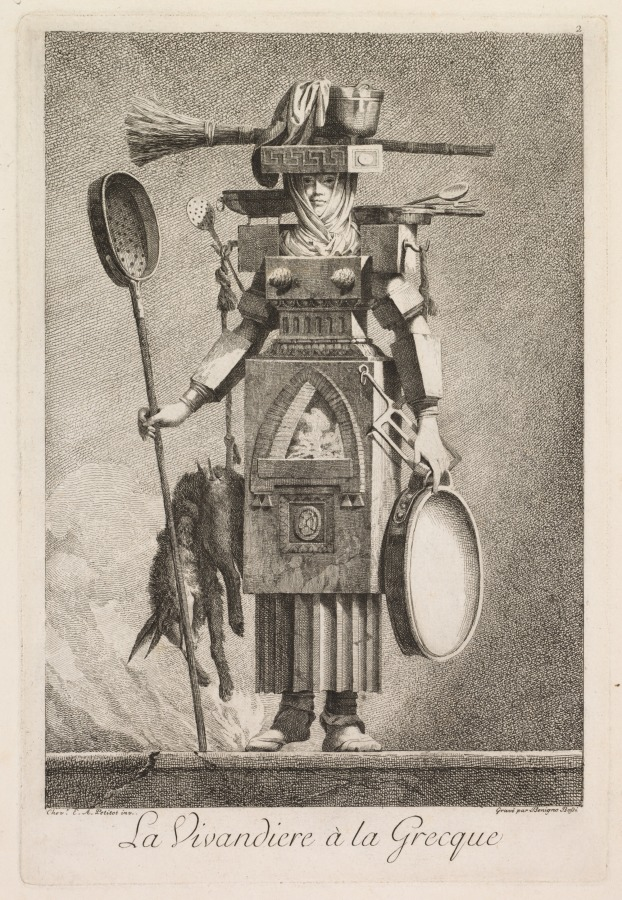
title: Camp Follower in the Greek Style, Plate 2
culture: Italy, 18th century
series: Mascarade à la Grecque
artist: Benigno Bossi (Italian, 1727–1792)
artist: after Ennemond-Alexander Petitot (French, 1727–1792)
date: 1771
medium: etching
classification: Print